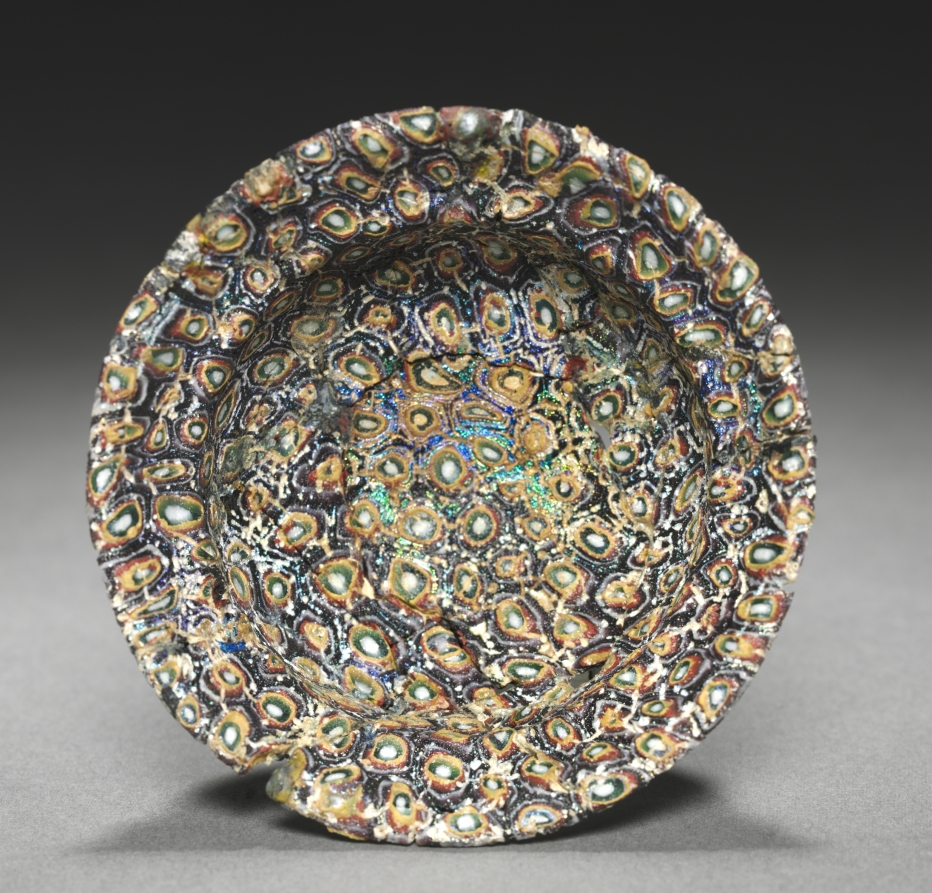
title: Millefiori Bowl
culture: Italy, Roman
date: 1–100 CE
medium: glass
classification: Glass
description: Mosaic glass, also called millefiori, was cast in a two-part mold. Fused glass rods of different colors were bundled together into patterns, then sliced into disk-shaped cross sections. These were placed within the mold and heated until fused. After cooling, the vessel’s surface was fire- or wheel-polished.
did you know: Millefiori, Italian for “thousand flowers,” describes the ancient glass-making technique later revived by Venetian artisans.